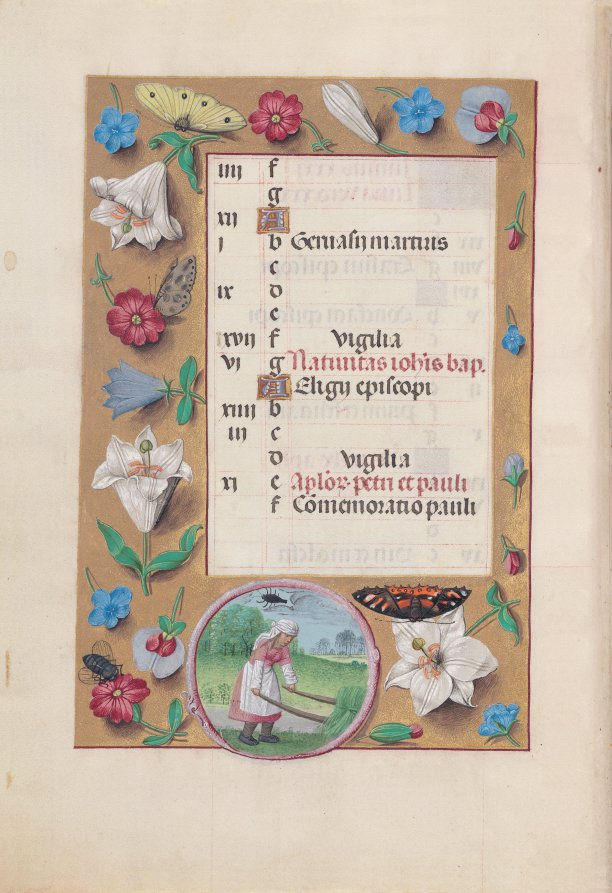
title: Hours of Queen Isabella the Catholic, Queen of Spain: Fol. 7v, June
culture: Flanders, Ghent and Bruges, late 15th century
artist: Master of the First Prayerbook of Maximillian (Flemish, c. 1444–1519)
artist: and Associates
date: c. 1500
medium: ink, tempera, and gold on vellum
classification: Bound Volume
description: A great lover of Flemish art, Queen Isabella treasured her many devotional books. This deluxe manuscript was created for her private devotions by highly organized and distinctly talented manuscript painters active in Ghent and Bruges. The Ghent-Bruges school represents the culmination of Flemish book painting, whose main features were the use of rich colors, illusionistic effects, a love of landscape, and a strong sense of visual narrative. Manuscripts produced by this circle of artists are renowned for their border decoration featuring a rich variety of realistically painted flowers, scrolling acanthus leaves, birds, and butterflies.